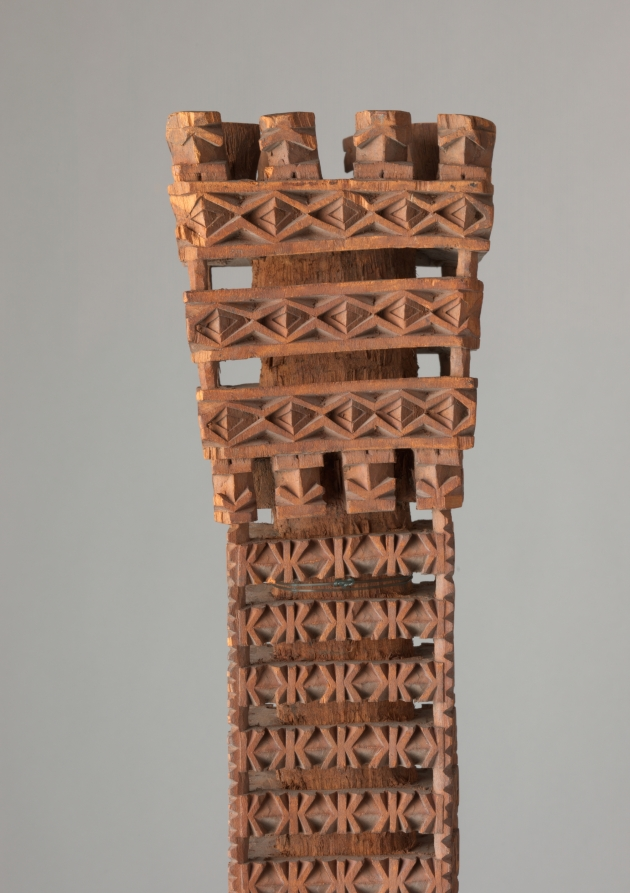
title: Ceremonial Adze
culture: Polynesia, Mangaia, Cook Islands, 19th century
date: 1800s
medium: wood, stone, fiber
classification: Sculpture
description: Before European contact, Polynesian carving tools were fashioned from bone, shell, stone, or teeth. The introduction of iron tools facilitated carving, while the demand of European sailors and missionaries for souvenirs provided a new market for craft products. Ceremonial adzes probably represented gods or spirits. The wooden handle of this example is carved with the characteristic K motif. The stone adze blade is lashed to the handle with finely plaited sennit fiber cord. According to legend, the distinctive pattern formed by the sennit lashing was taught to Mangaian craftsman by the gods.